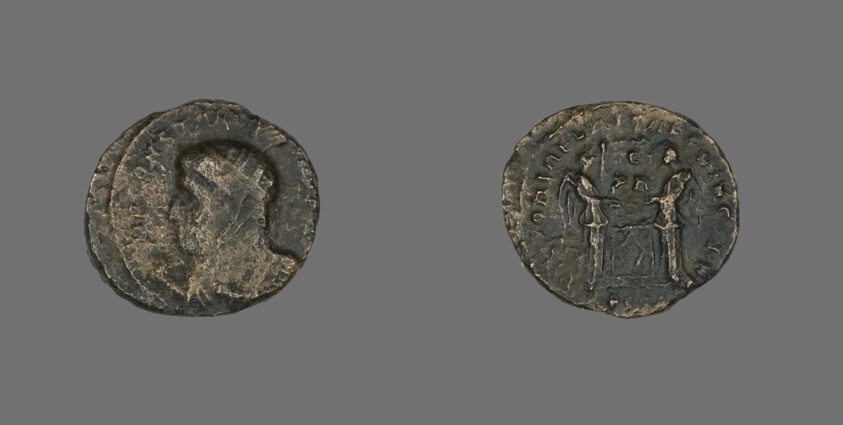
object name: Coin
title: Coin Portraying Emperor Constantine I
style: roman (ancient, style or period), ancient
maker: Roman, minted in London or Arles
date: about 319-320 CE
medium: Bronze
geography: Roman Empire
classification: coin; ancient art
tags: portrait